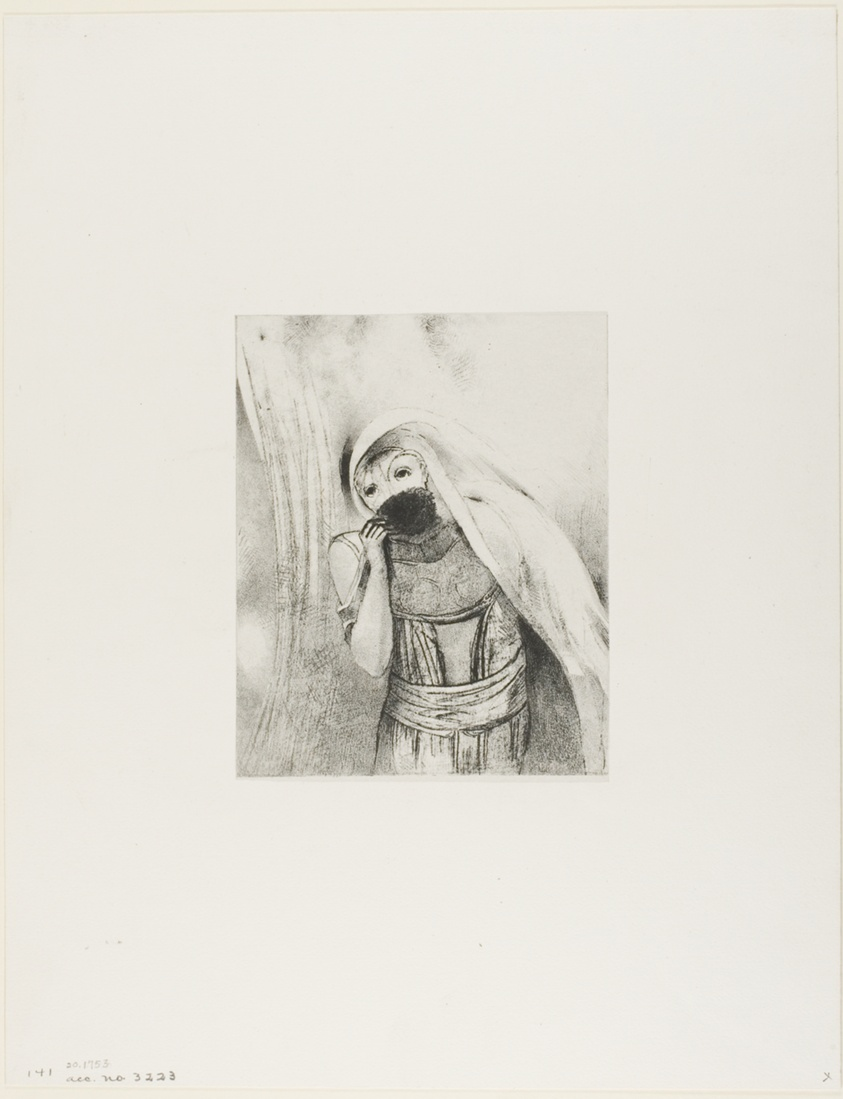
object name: Print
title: She Draws From Her Bosom a Sponge, Perfectly Black, and Covers it With Kisses, plate 8 of 24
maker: Odilon Redon (French, 1840-1916)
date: 1896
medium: Lithograph in black on light gray China paper laid down on ivory wove paper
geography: France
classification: lithograph; print; prints and drawing; paper